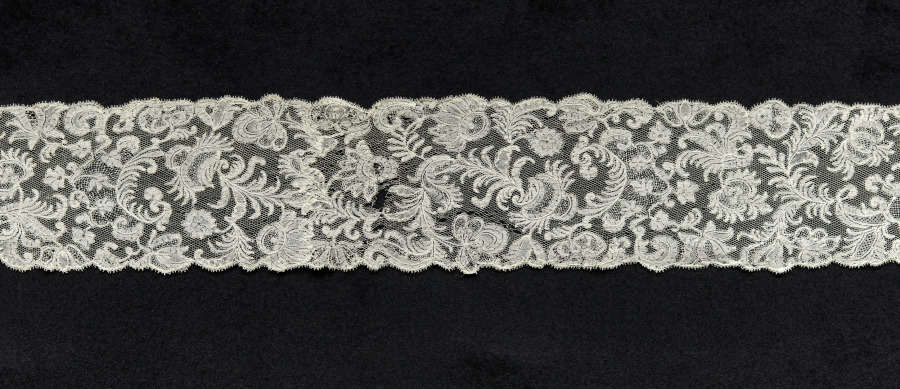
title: Lace Lappet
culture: Belgium, Brussels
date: 1700–1720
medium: Linen: bobbin lace (Point d'Angleterre)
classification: Lace